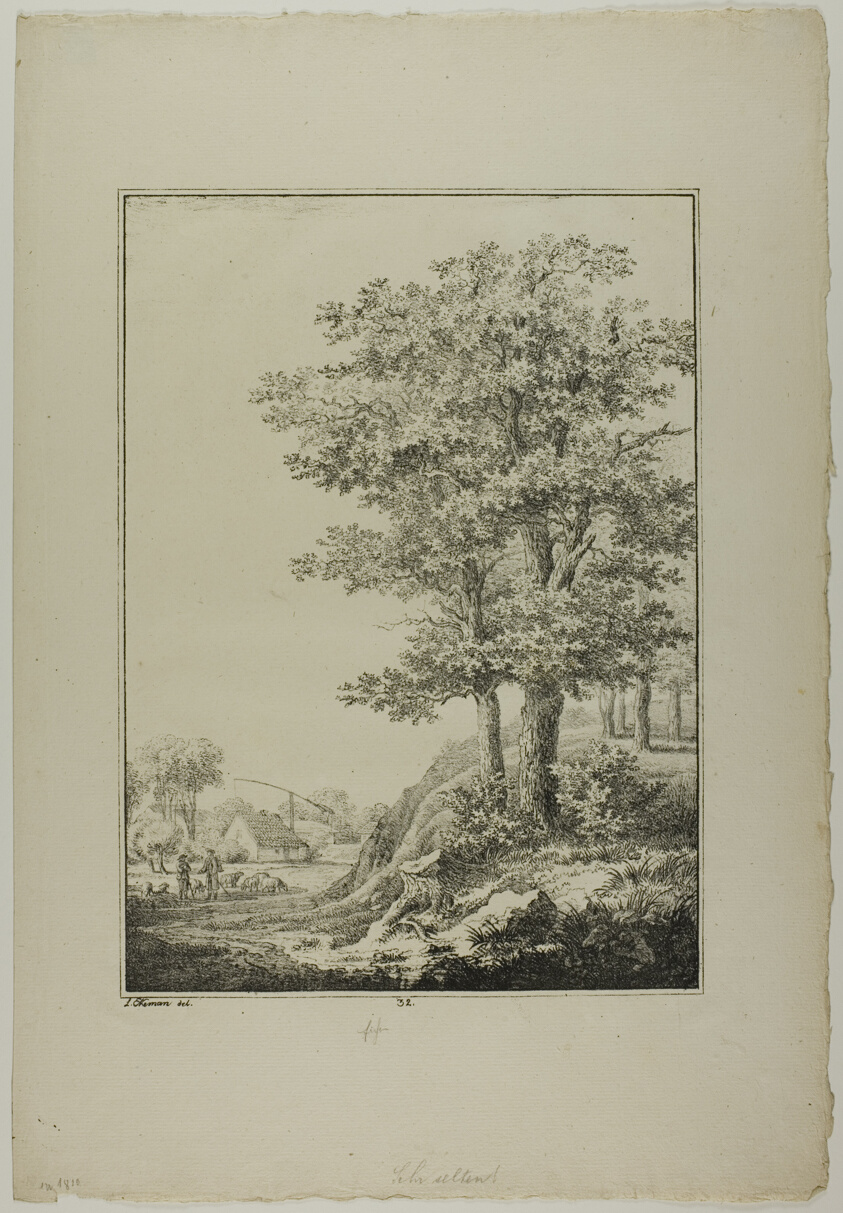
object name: Print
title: Plate 32 from Blatt Baum und Landschafts Studien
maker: Lorenz Ekemann Alesson (Swedish, 1791-1828)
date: c. 1810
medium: Lithograph on paper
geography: Sweden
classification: lithograph; print; prints and drawing